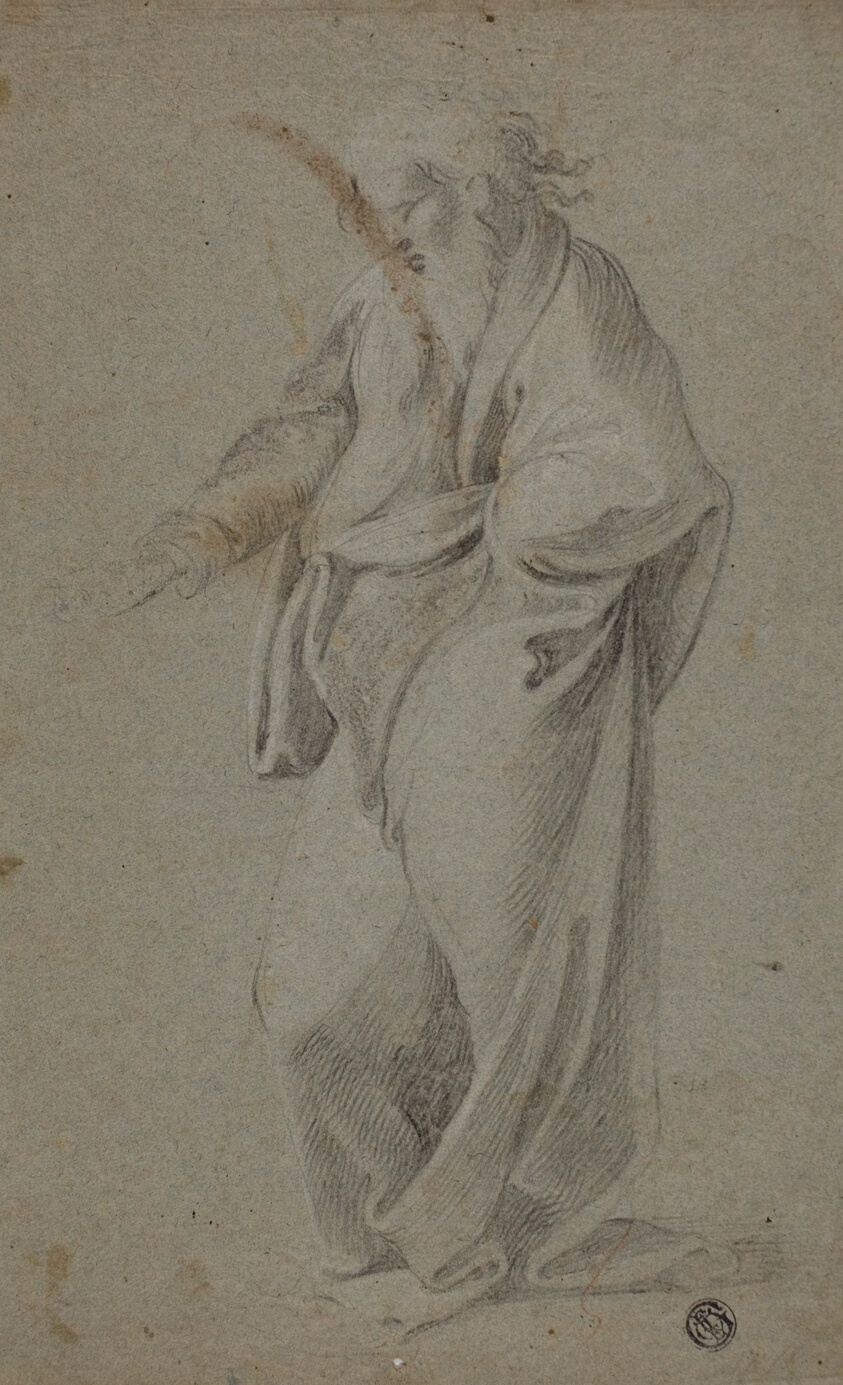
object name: Drawing and Watercolor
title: Noah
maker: After Raffaello Sanzio, called Raphael; Italian, 1483-1520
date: late 16th/early 17th century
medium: Black chalk, heightened with white chalk, on blue-gray laid paper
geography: Italy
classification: chalk; drawings (visual works); prints and drawing